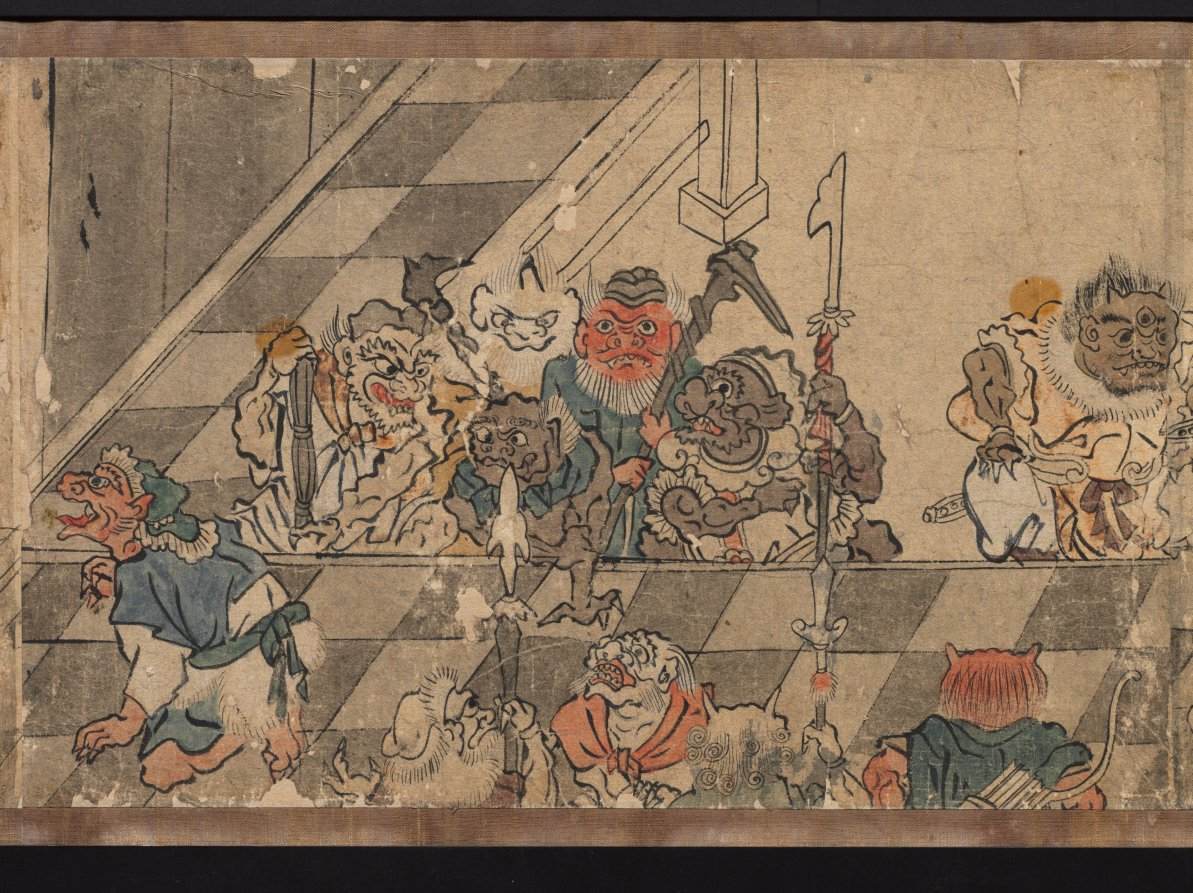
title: Oeyama Engi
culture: Japan, Edo period (1615–1868)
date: 1615–1868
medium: one of a pair of handscrolls; ink and color on paper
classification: Painting